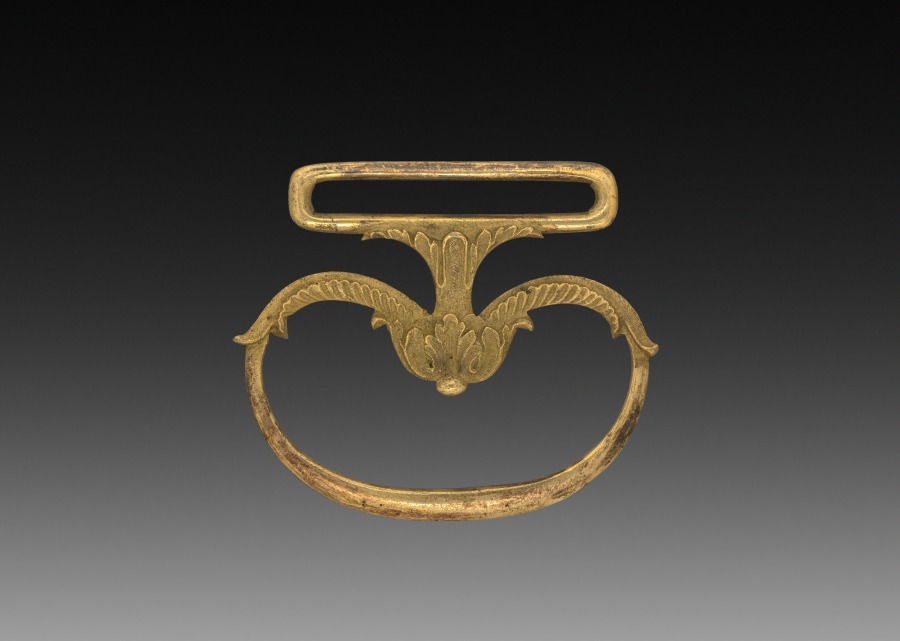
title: Bell Pull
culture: France, late 18th century, style of Louis XVI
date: late 1700s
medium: gilt bronze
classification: Metalwork